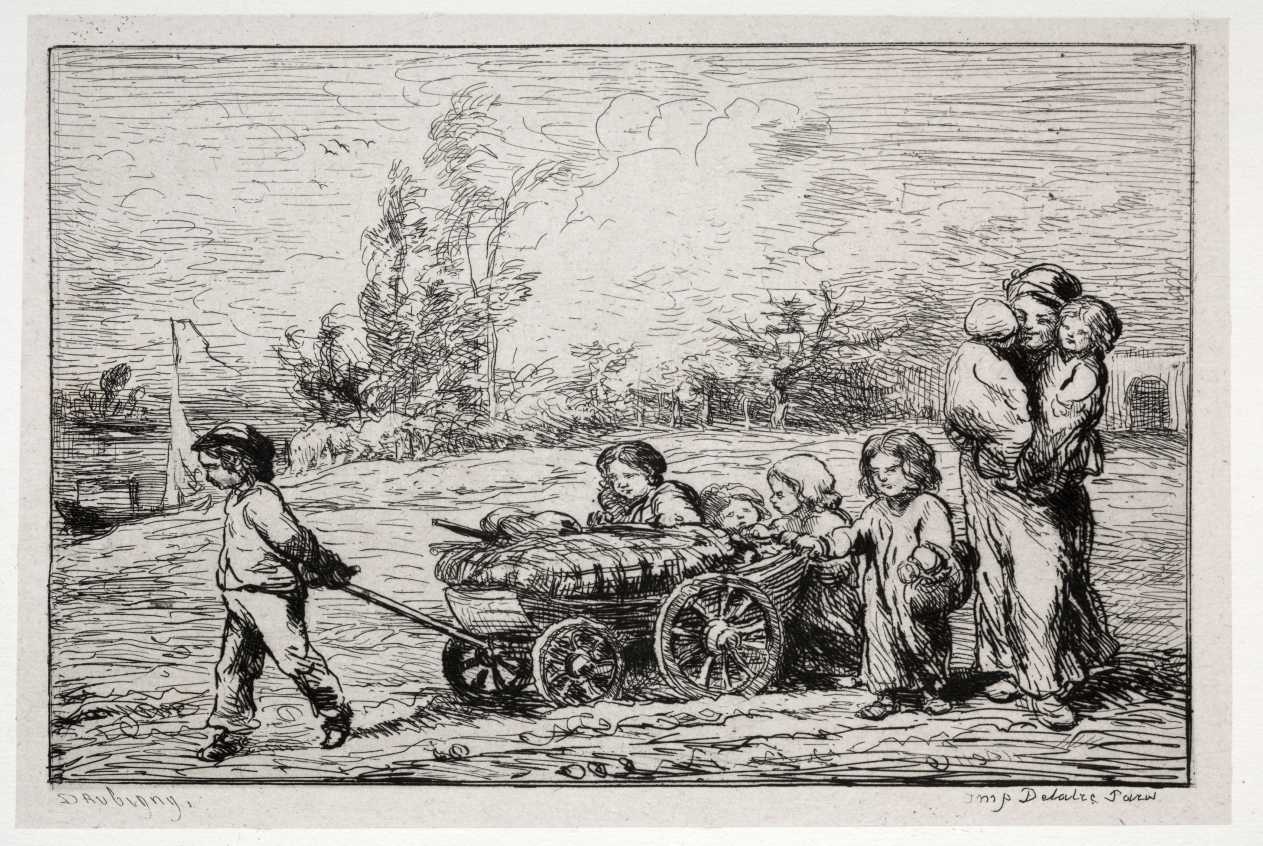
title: The Boat Trip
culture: France, 19th century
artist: Charles François Daubigny (French, 1817–1878)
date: 1861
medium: 16 etchings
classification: Portfolio